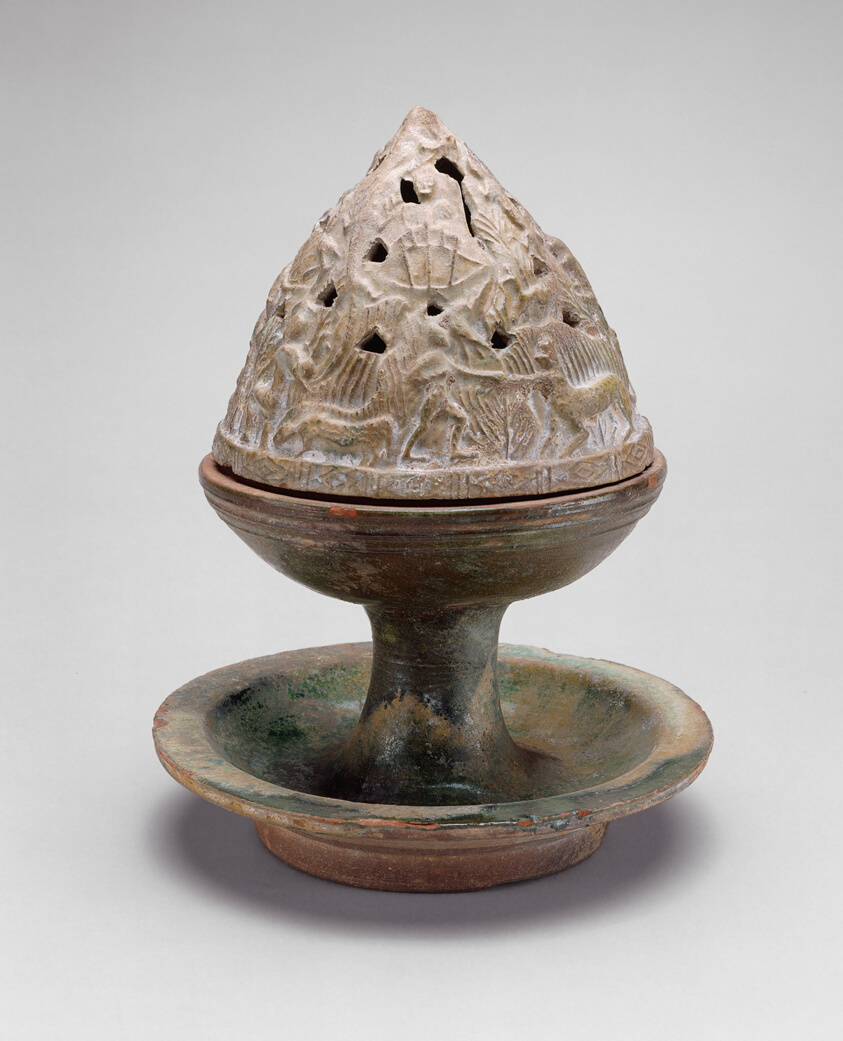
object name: Religious/Ritual Object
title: Mountain-Shaped Incense Burner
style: Chinese (culture or style)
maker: China, probably Guangdong or Guangxi province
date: Western Han dynasty, 206 BCE–9 CE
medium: Brick-red earthenware with green lead glaze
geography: China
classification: earthenware; ceramics; sculpture; asian art; ritual objects